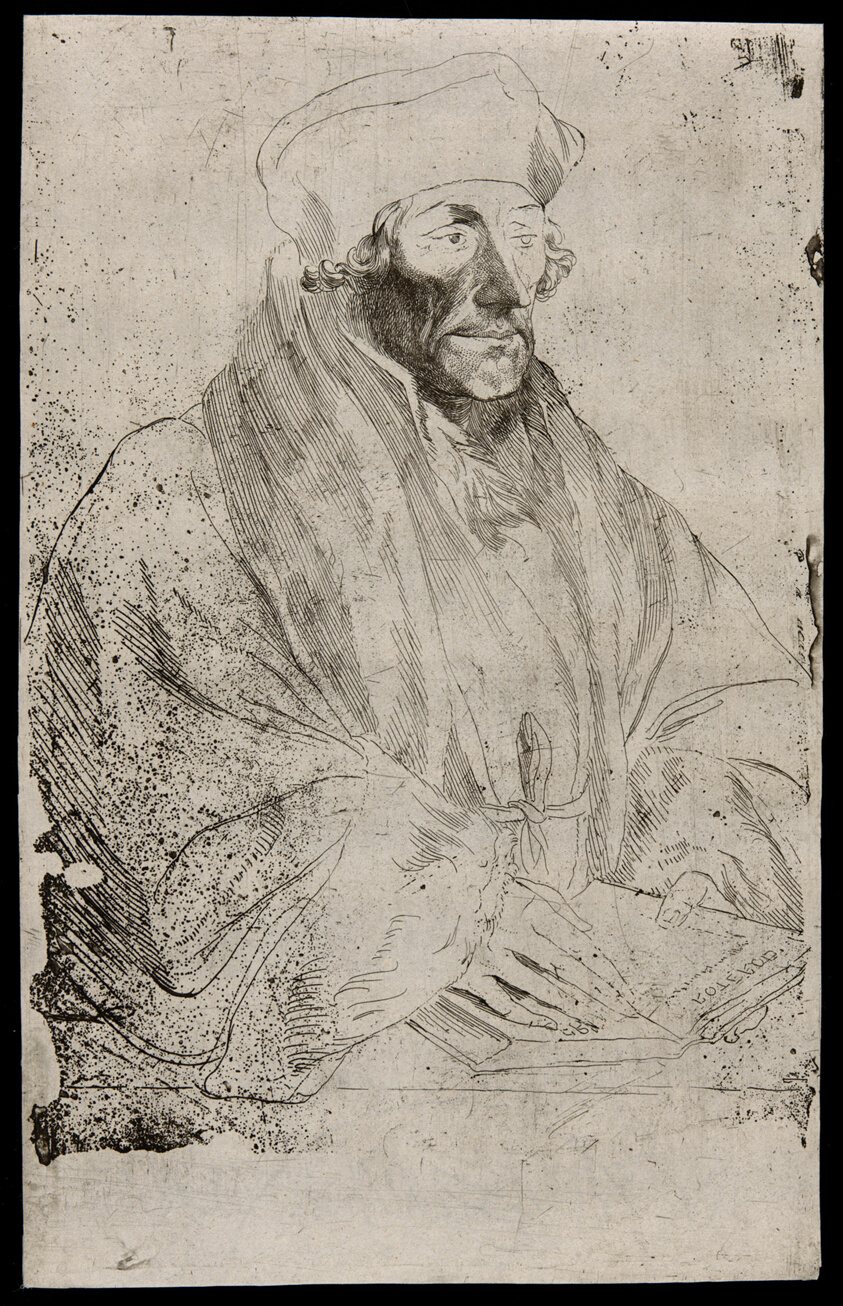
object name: Print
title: Desiderius Erasmus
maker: Anthony van Dyck (Flemish, 1599-1641); after Hans Holbein, the Younger (German, 1497-1543)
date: 1630/33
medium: Etching in black on ivory laid paper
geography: Flanders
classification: etching; print; prints and drawing